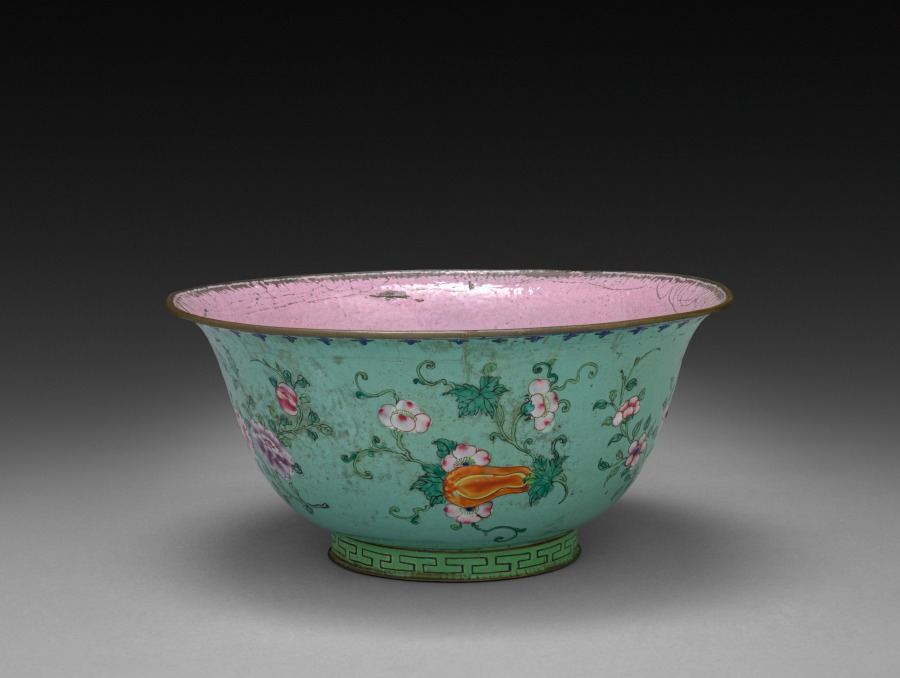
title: Bowl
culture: China, Qing dynasty (1644–1911)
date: 1800s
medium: enamel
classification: Enamel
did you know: The inside of the bowl is decorated with a pair of peaches, a symbol of immortality.